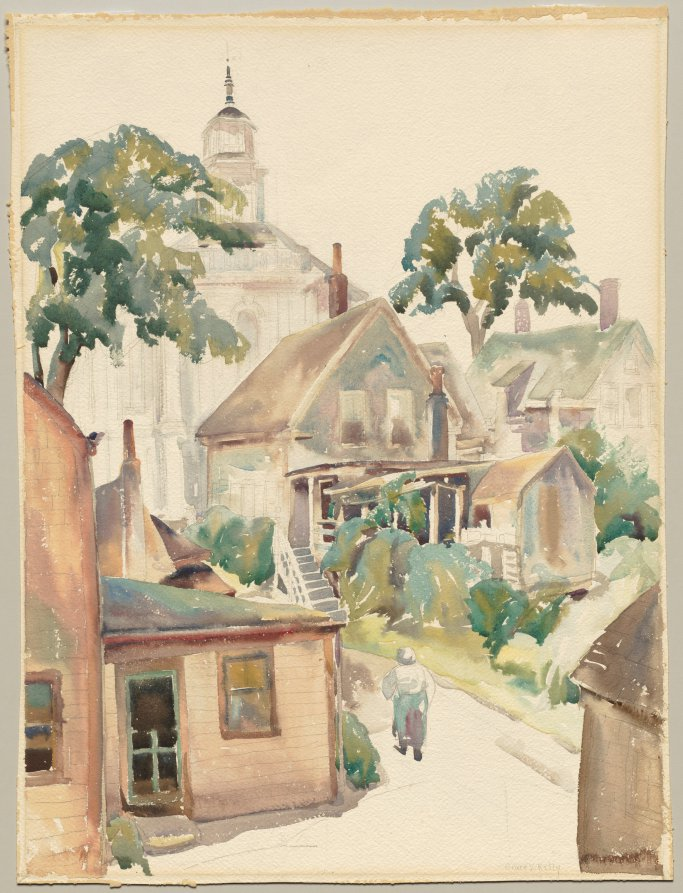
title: Provincetown Having Its Morning Fog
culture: America, Ohio, Cleveland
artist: Grace V. Kelly (American, 1877–1950)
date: 1927–28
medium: watercolor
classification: Drawing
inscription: Signed "Grace V. Kelly" in graphite, lower right